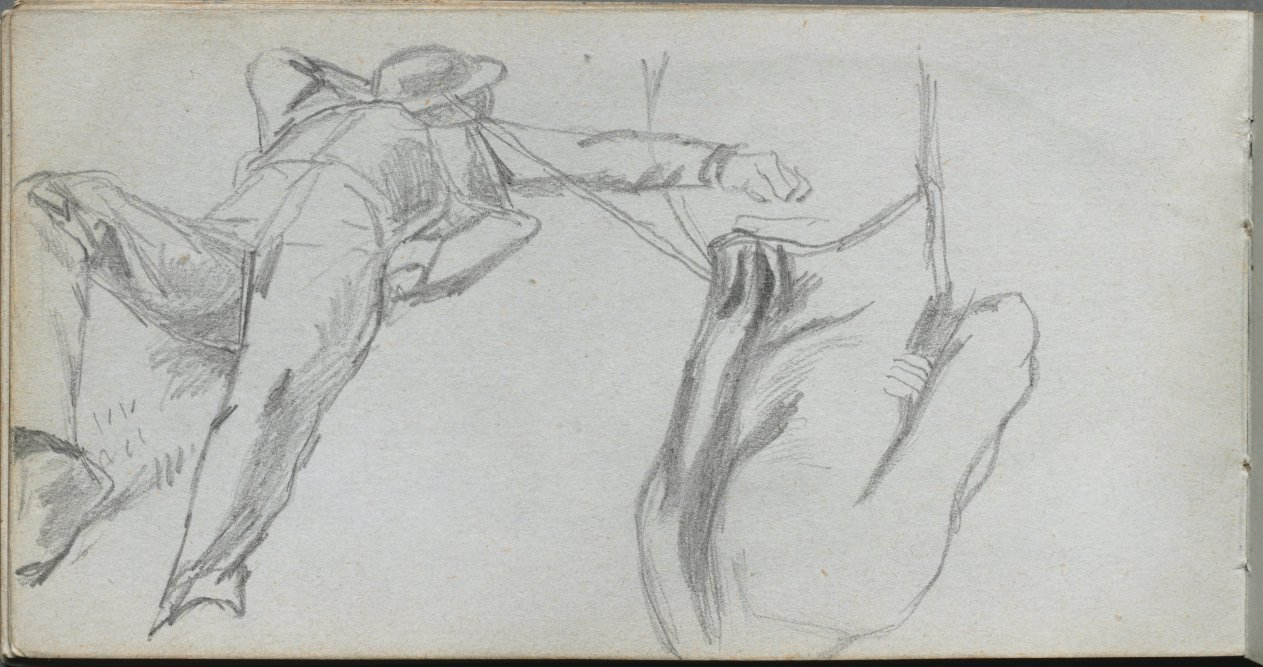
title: Sketchbook, page 58: Reclining Figure and Figure from Behind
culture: France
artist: Ernest Meissonier (French, 1815–1891)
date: c. 1860s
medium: graphite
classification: Bound Volume